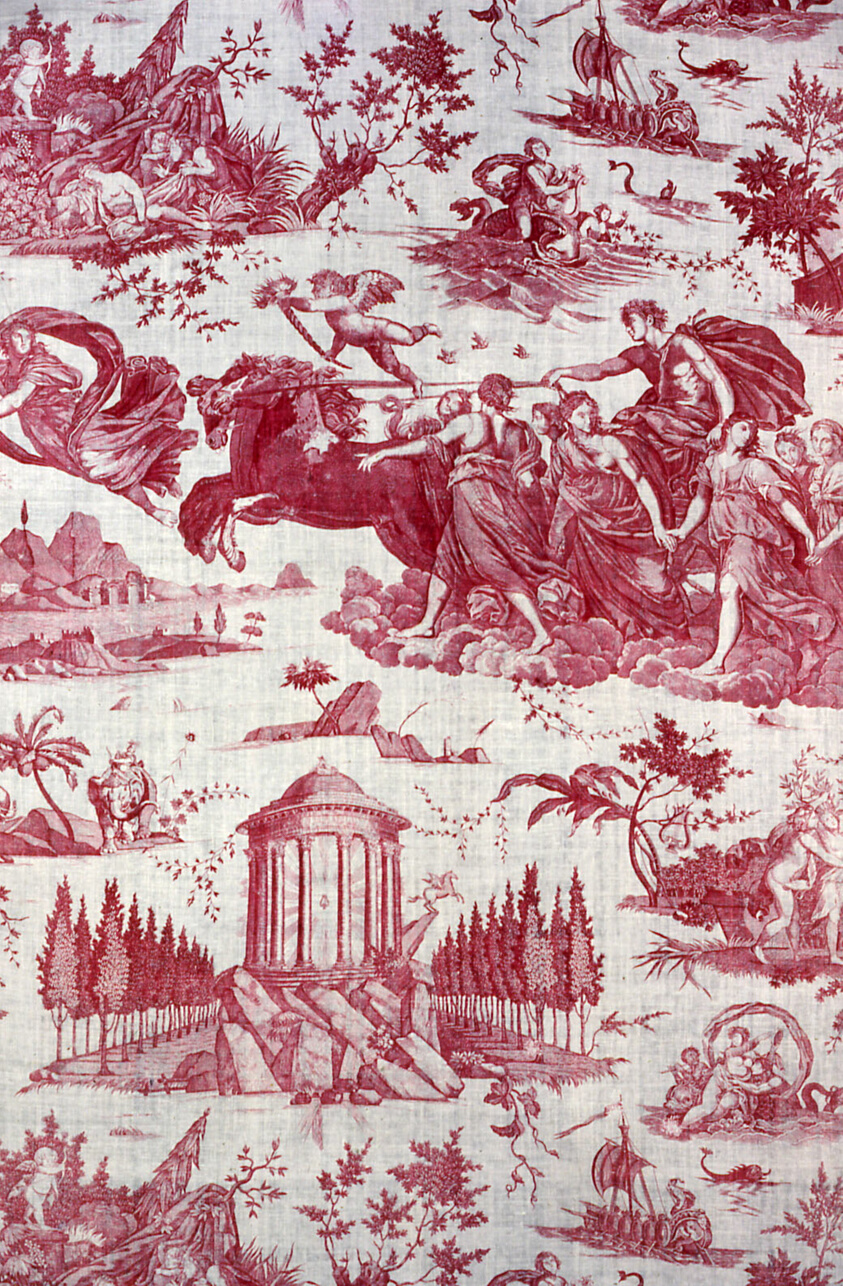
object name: Textile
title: Le Char de l'Aurore (The Chariot of Dawn) (Furnishing Fabric)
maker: After works by Guido Reni (Italian, 1575–1642) and other artists; Manufactured by Petitpierre et Cie. (French, 1760-1791); France, Nantes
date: 1785/89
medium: Cotton, plain weave; copperplate printed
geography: Nantes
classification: textile; weaving - printed; furnishing textile